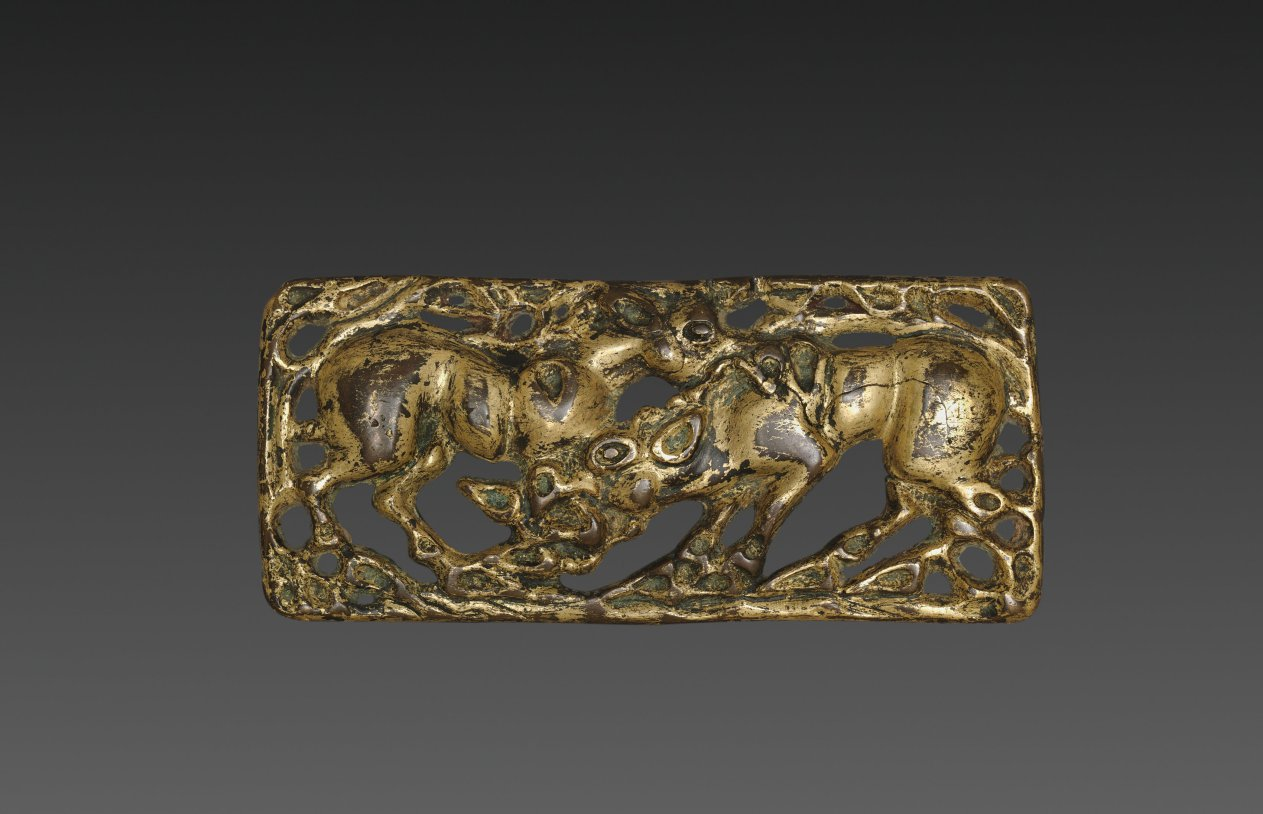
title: Belt Buckle with Animals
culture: China, Ordos region, Western Han dynasty (206 BCE–8 CE)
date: 202 BCE–9 CE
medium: gilt bronze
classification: Metalwork